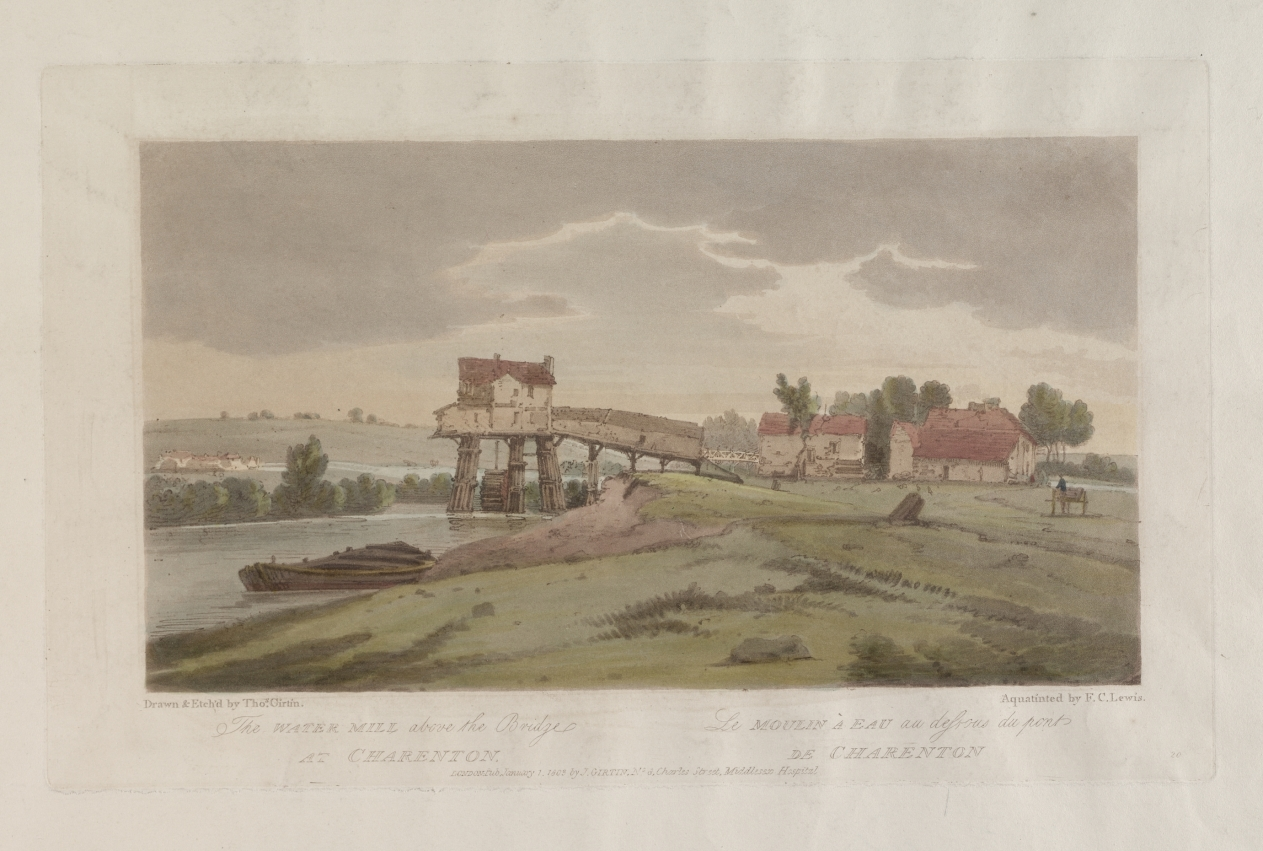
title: A Selection of Twenty of the Most Picturesque Views in Paris: The Water Mill above the Bridge at Charenton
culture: England, 19th century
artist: Thomas Girtin (British, 1775–1802)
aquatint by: Frederick Christian Lewis (British, 1779–1856)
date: 1803, printed 1810 or after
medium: softground etching and aquatint printed in brown, hand-colored with watercolor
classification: Print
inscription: In plate; Drawn & Etch'd by Thos Girtin; Aquatinted by F. C. Lewis; LONDON: Pubd January 1 1803 by Thos & John Girtin, No. I, Little Newport Street, Gerrard Street, Soho.